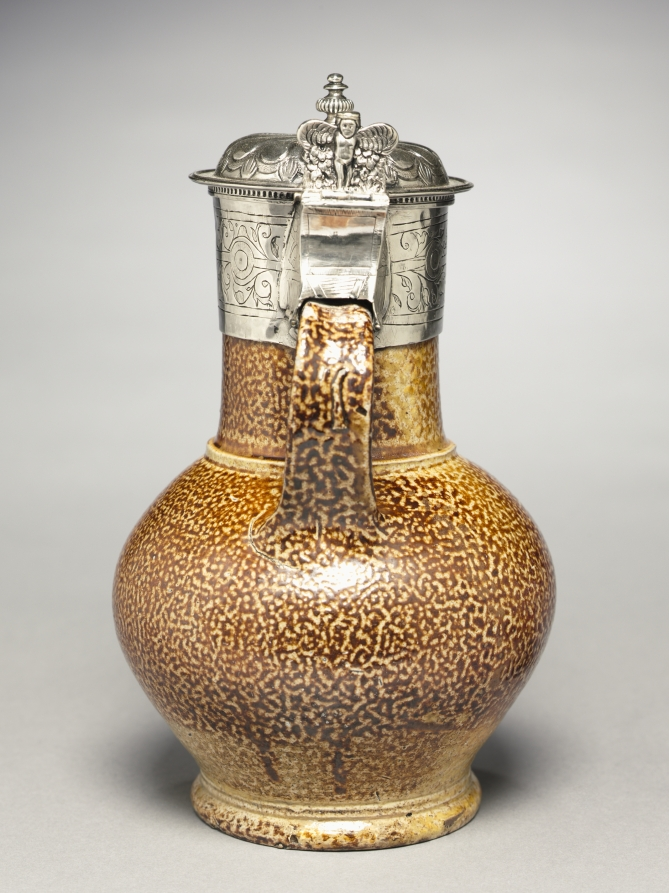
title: Covered Jug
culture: Germany (jug) and England (mounts), 16th century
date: c. 1570–1573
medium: Tigerware, silver mount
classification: Ceramic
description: German Stoneware The production and export of German stoneware reached its peak in the late 1500s. Prized for its durability and stone-like appearance, German stoneware became one of the most widely traded forms of pottery, even finding popularity in early America. The distinctive pebbly glass surface, resembling an orange peel, was achieved by introducing salt into the hot kiln during the firing process. This glaze gave clear definition to the coats of arms or other emblems that often formed the surface decoration on large works, usually jugs.